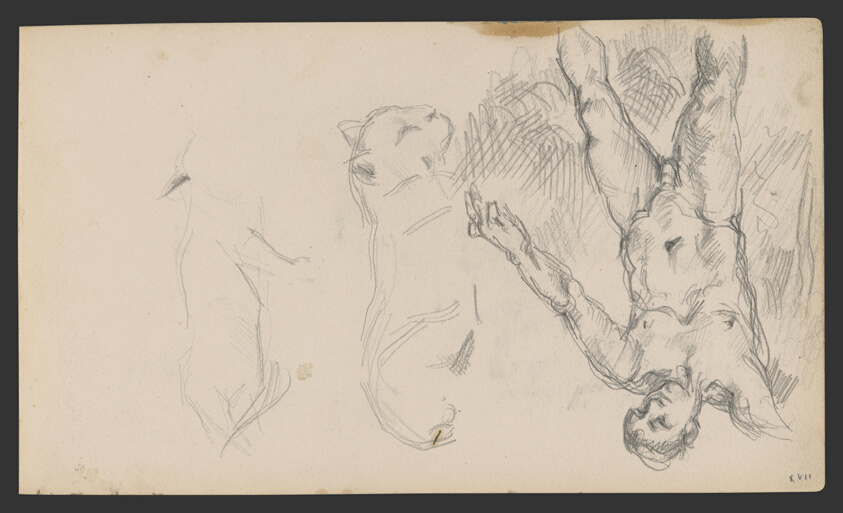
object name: Drawing and Watercolor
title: Sketchbook No. 2 (L'Estaque)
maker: Paul Cézanne; French, 1839-1906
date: 1875–86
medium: Graphite and pen and ink drawings on paper, bound into a book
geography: France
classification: sketchbook; graphite; prints and drawing; paper